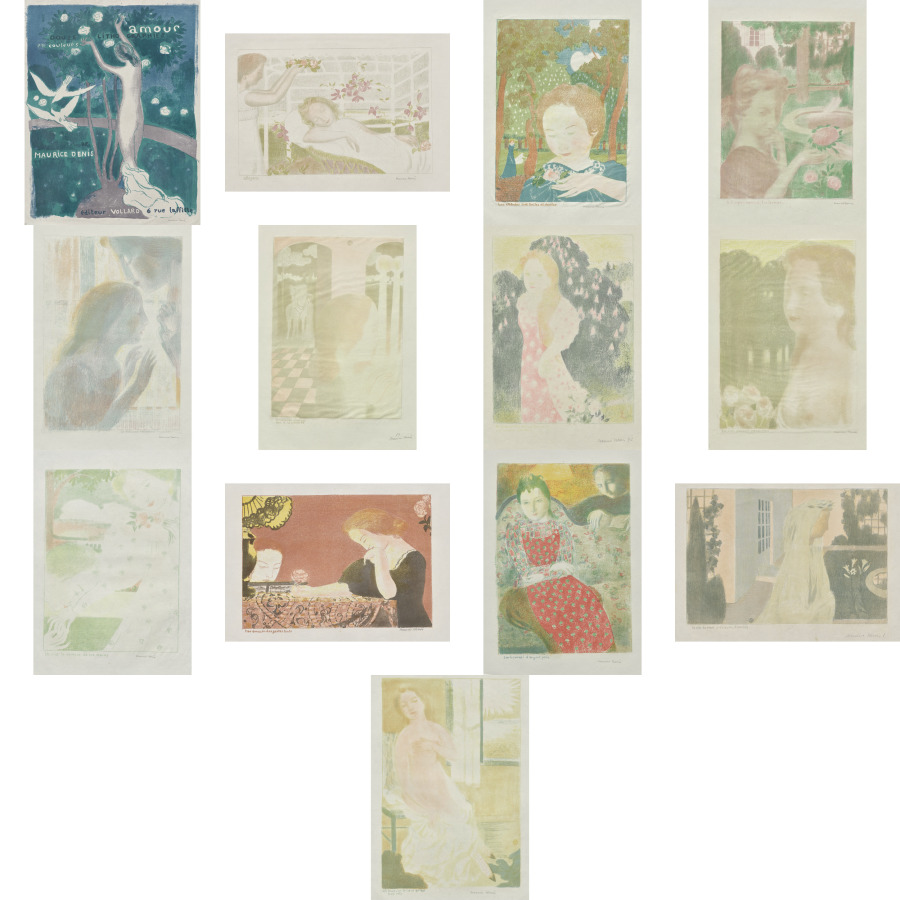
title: Love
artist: Maurice Denis (French, 1870–1943)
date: 1899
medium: 13 color lithographs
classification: Portfolio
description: Maurice Denis belonged to the Nabis, a group of artists who came together in 1889 to pursue a radical new style informed by subjective experience and emotion. This print is from a series in which Denis explored his devotion to his wife, Marthe, by depicting her in a variety of settings alongside titles drawn from his own journal. The vague but evocative images were meant to encourage the viewer to draw connections to the theme and meditate on its meaning.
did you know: Maurice Denis was a devout Catholic and often drew visual connections between his wife, Marthe, the subject of this print series, and the Virgin Mary.